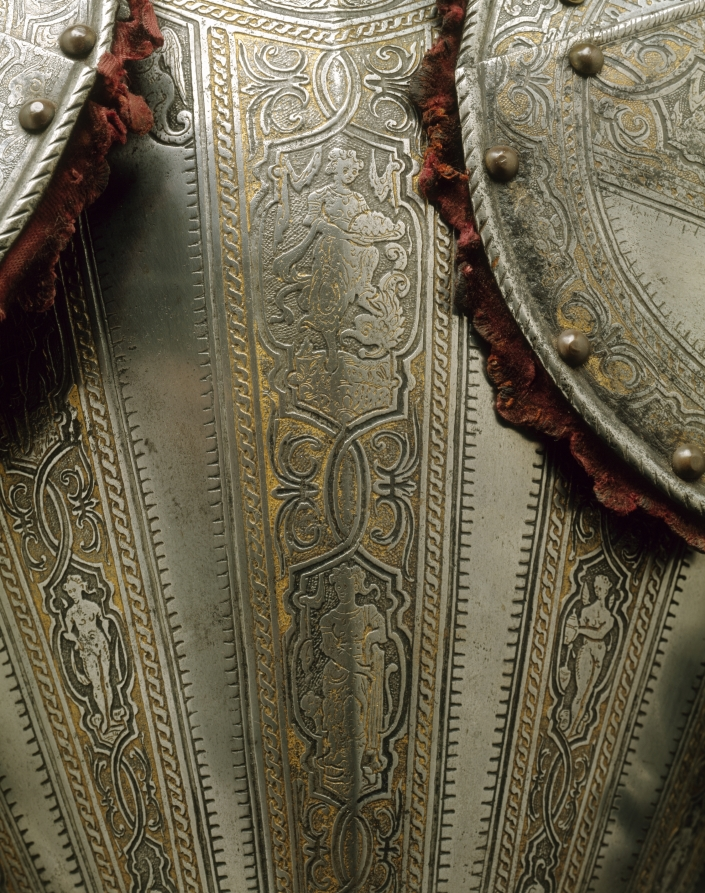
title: Half Armor for the Foot Tournament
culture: Italy, Milan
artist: Pompeo della Cesa (Italian, active 1572–93)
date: c. 1590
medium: etched and gilded steel, brass rivets, leather and velvet fittings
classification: Arms and Armor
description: This armor was designed for the foot tournament, an event that was separate from the equestrian jousts popularized during the Middle Ages and still favored among Renaissance aristocracies throughout Europe. Foot tournaments were commonly fought over a barrier that separated the combatants and gave protection to their legs, so a half-armor such as this one provided sufficient protection. The original owner of this suit would have worn it with colorful puffed and slashed britches and hose. The use of outlandish accessories, such as a large ostrich feather plume (a brass plume holder may be seen on the back of the helmet) and red velvet pickadils between the steel plates, provided additional splendor.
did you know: Pompeo della Cesa was the Armani or Gucci of the 1500s; everyone wanted to wear him.